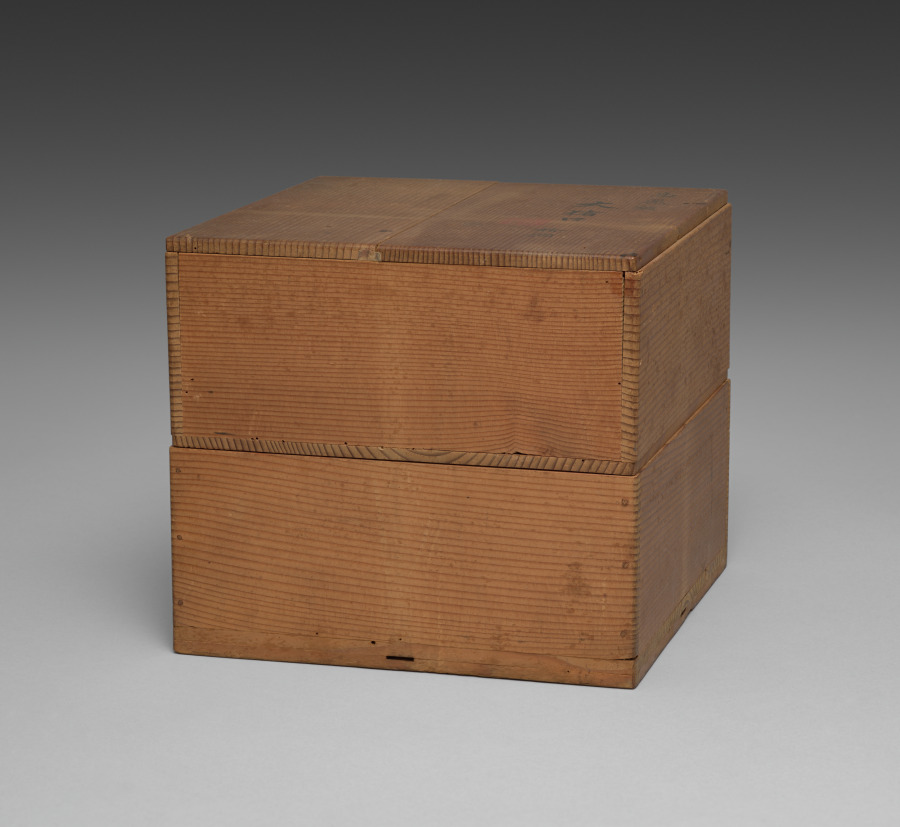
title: Dining Set with Plum Blossoms and Cracked-Ice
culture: Japan, Edo period (1615–1868) to Meiji period (1868–1912)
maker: Seifū Yohei II (Japanese, 1844–1878)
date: 1875–78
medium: Porcelain with molded designs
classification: Ceramic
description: Each item in this set has a delicate low-relief design of flowering plum branches over scattered, intersecting lines meant to resemble the cracked-ice surface of a frozen body of water and is signed on the base in gold pigment. While Yohei II produced many fine works in underglaze blue, like those produced by Kiyomizu Shichibei, he also made works in quite different styles later in his career, from the early 1870 s. In 1873, he was appointed purveyor to the Industrial Center of Kyoto Prefecture, a designation associated with Kyoto’s efforts to reach an international market through the port of Kobe; and from 1875 until his death, he was involved in national-level projects to present Japanese ceramics across the world. It was during this period that Yohei III was apprenticed to Yohei II, and it has been suggested that this set may in fact be an early example of Yohei III’s work, which he signed with his teacher’s name. Decorated with flowers resembling Japanese textile motifs, the set calls to mind the design of Yohei II’s pair of vases with plum blossoms in the Victoria and Albert Museum. Here, the elaborate trees created for a formal public exhibition setting have been translated into the approachable blossoms of the genteel domestic environment. While the designs are consistent across the pieces, each raised flower petal and pistil and each incised line in the ice was done by hand, so the cups, bowls, and dishes are similar yet unique. The bottoms of two boxes once identified the set’s owner, but the information has been deliberately obscured with black ink. However, inscriptions still visible appear to indicate two occasions, once at the end of July 1886 , and once again in June 1916 , when parts of the set were requested from Hokura in Niigata Prefecture. The location corresponds to a neighborhood in the present-day city of Jōetsu. The surname Tsuji 辻 also appears on a paper tag affixed to one of the box cloths. Future research may possibly reveal more about their provenance. A vase by Yohei III in a private collection combines the formal grandeur of the Yohei II vases in the Victoria and Albert Museum with the gentler design of this dining set, placing flowering plum trees against soft, scalloped-edge clouds resembling those in golden screens.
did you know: The dining wares have a creamy white coloration that the four boxes containing them identify as Korean in style.